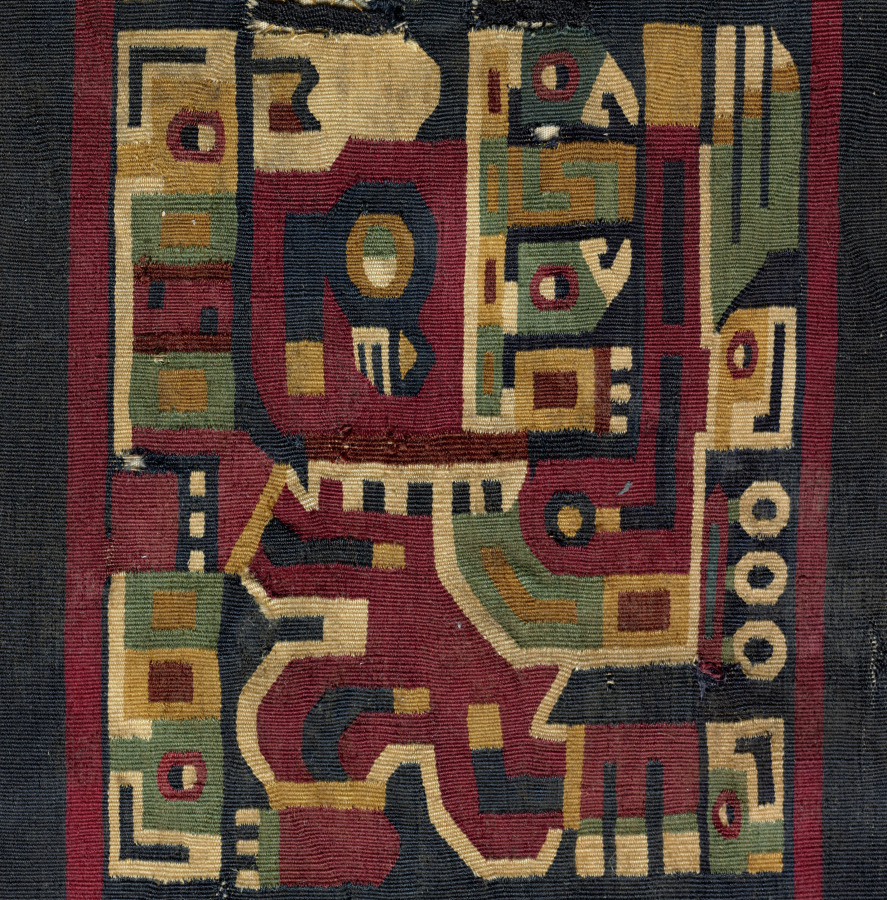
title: Tunic Fragments with Bird-Headed Creature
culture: Central Andes, Middle Horizon, Wari, 6th-11th century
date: 600–1000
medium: Camelid fiber, cotton; tapestry weave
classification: Textile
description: The bird-headed creature in profile that repeats in each of this tunic's design fields gazes upward, holds a staff of authority in front of its body, and wears an ornate headdress behind which a three-feathered wing can be seen. The extremely high technical quality of such tunics suggests that the Wari reserved bird imagery for their most exalted rulers. Here, the original incorporated more than twice as much yarn as the routine--some 19 miles, all handmade and much dyed an inky, dark blue, the most prestigious of Wari colors.